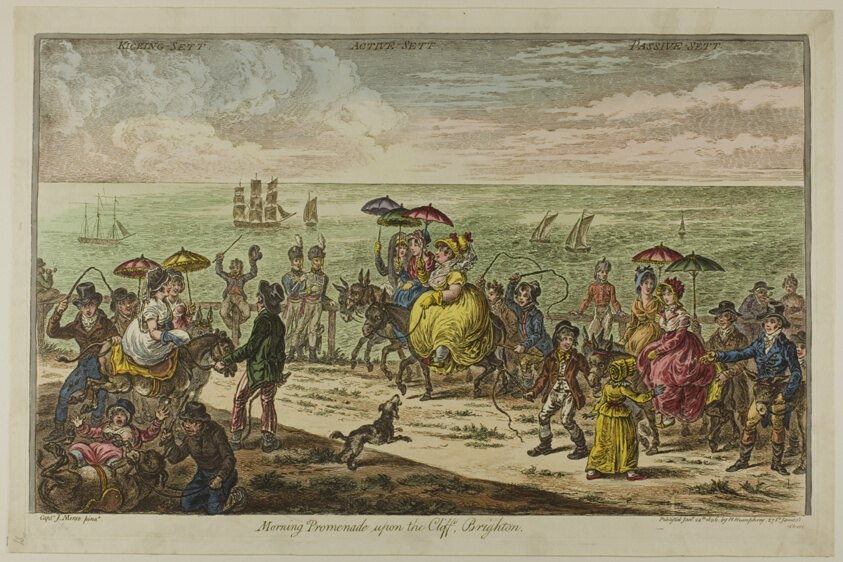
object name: Print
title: Morning Promenade Upon the Cliff, Brighton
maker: James Gillray (English, 1756-1815); after Captain J. Morse (English, 1779-1804); published by Hannah Humphrey (English c. 1745-1818)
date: published January 24, 1806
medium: Hand-colored etching on paper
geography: England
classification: etching; print; prints and drawing